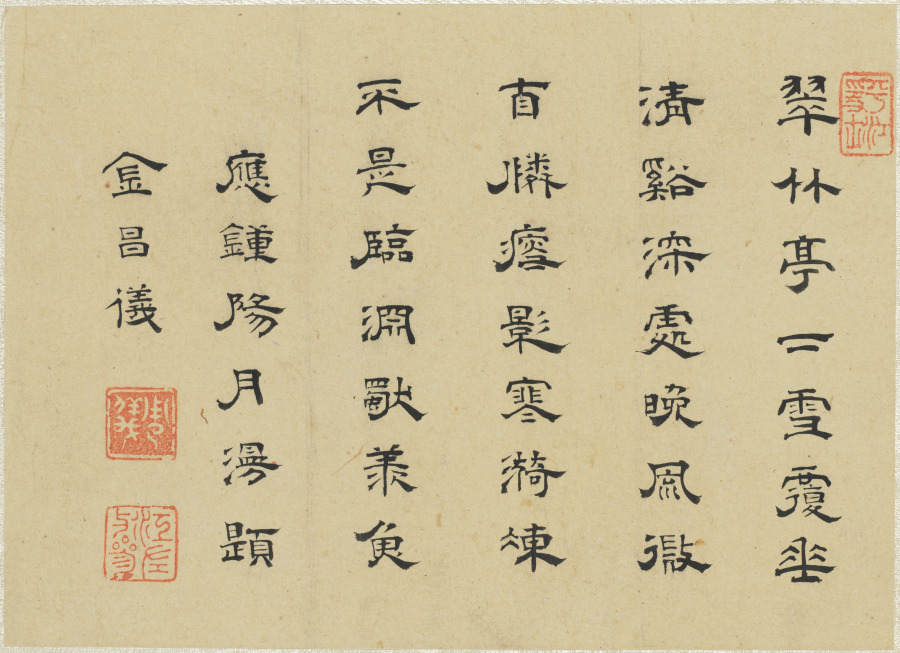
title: Album of Miscellaneous Subjects, Leaf 10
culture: China, Qing dynasty (1644-1911)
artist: Fan Qi (Chinese, 1616–after 1694)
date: early 1650s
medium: album leaf, ink and color on silk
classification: Painting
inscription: Artist's signature: Zhongling Fan Qi 鐘陵樊圻 ["Fan Qi of Zhongling" (Zhongling is another name for Nanjing.)]. Artist's seals: Fan Qi 樊圻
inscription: Poem by Zhou Yi 周儀 (mid 17th century–about 1705): Green bamboo stand alone with a snowy covering,/ In the deep recesses of a secluded valley, the evening breeze is light./ White egrets are lean as shadows with the cold ripples frozen,/ They enter the gorge not just to admire the fish.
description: Leaf 10 Zhou Yi's colophon reads: Green bamboos stand alone with a snowy covering, In the deep recesses of a secluded valley, the evening breeze is light. White egrets are lean as shadows with the cold ripples frozen, They enter the gorge not just to admire the fish.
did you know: Icicles encase the leaves and red berries of the Nandina domestica (Heavenly Bamboo).